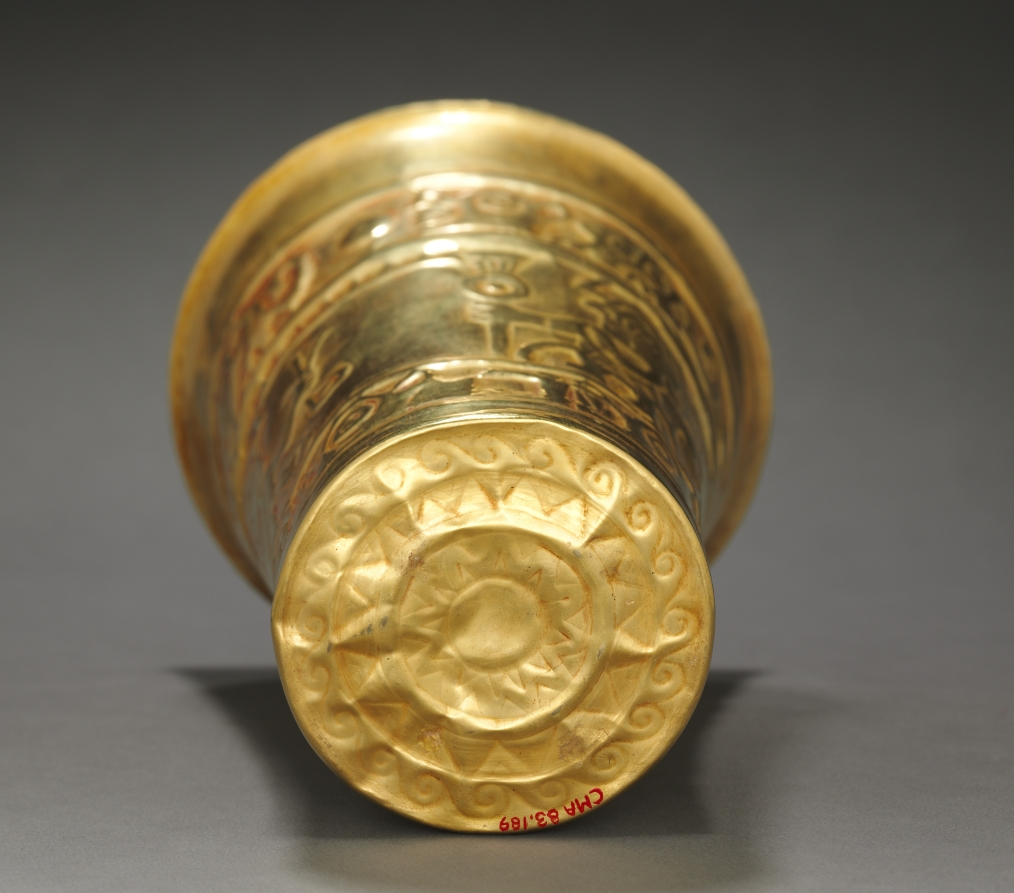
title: Beaker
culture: Peru, North Coast, Sicán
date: c. 800–1370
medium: hammered and embossed gold alloy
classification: Metalwork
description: Profile figures are unusual in Sicán metal beakers. The presence of such figures is one reason the museum is undertaking research to determine whether this vessel is authentic.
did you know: Embossed in the central band of this cup are warriors carrying clubs and slings.